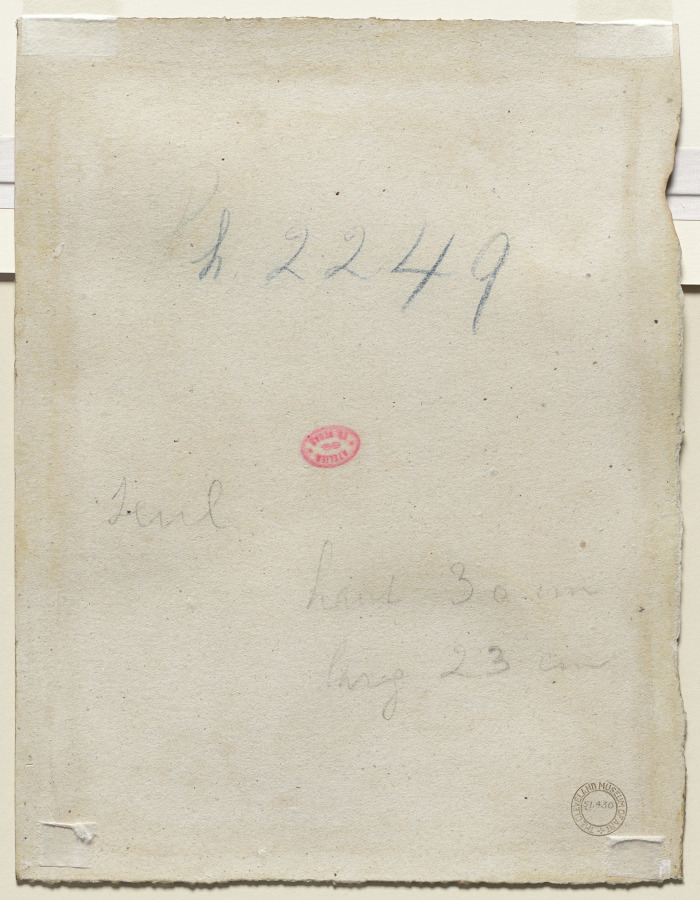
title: Sheet of Studies and Sketches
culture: France, 19th century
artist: Edgar Degas (French, 1834–1917)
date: 1858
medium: graphite, pen and dark brown ink, and watercolor on thick ivory wove paper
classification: Drawing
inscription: Inscribed, lower left, in graphite: Flor. 1857; stamped, lower left, in red ink: artist’s stamp [Lugt 658]; verso, in red ink: estate stamp [Lugt 657]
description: Degas traveled to Florence, Italy, in July 1858, where he made this sheet of studies. The featured imagery is fragmented and dissociated, suggesting the young artist's engagement with art of the past. The refined female head drawn at center in graphite was copied from a drawing then attributed to Leonardo da Vinci in the Uffizi Gallery's collection. Other sketches record Degas's responses to Florentine sculpture. At upper right, he sketched an informal portrait of his cousin Giulia Bellelli, probably from life.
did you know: The date Degas wrote on this drawing is incorrect; he didn't visit Florence until 1858, and must have inscribed the sheet years later.